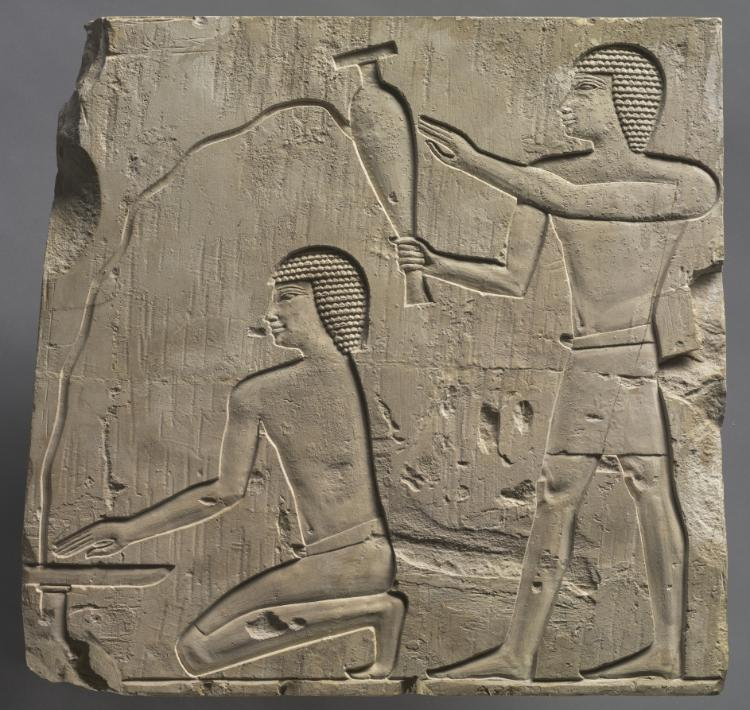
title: Priests Performing Funeral Rites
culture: Egypt, Late period (715–332 BCE), Dynasties 25–26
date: c. 667–647 BCE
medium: limestone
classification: Sculpture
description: Attendant pouring a libation for the deceased. In the style of the Old Kingdom, its prototype is in the Temple of Deir el Bahari where the figures are reversed.